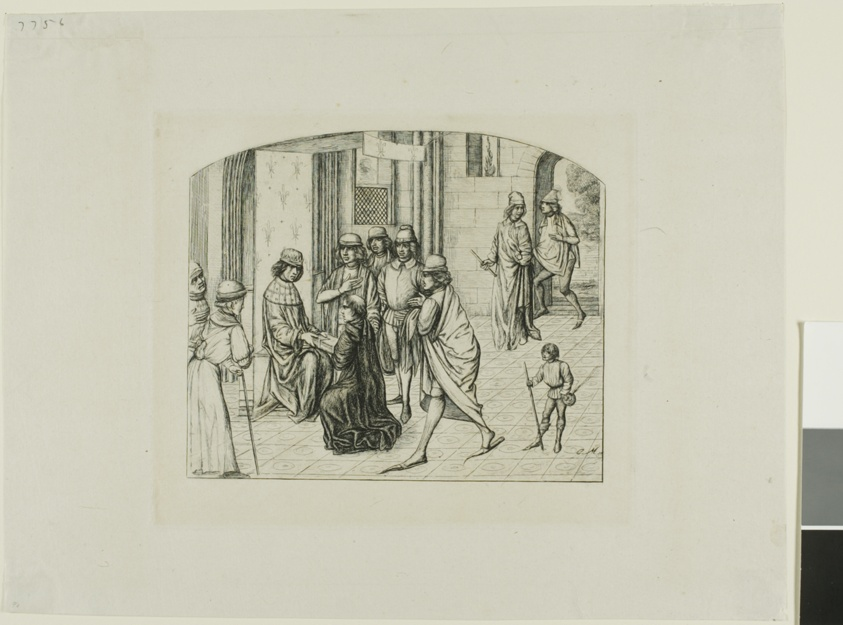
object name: Print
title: The Printer Valère Maxime being Presented to King Louis XI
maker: Charles Meryon (French, 1821-1868)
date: 1860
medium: Etching and drypoint on grayish ivory laid paper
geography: France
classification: etching; print; prints and drawing